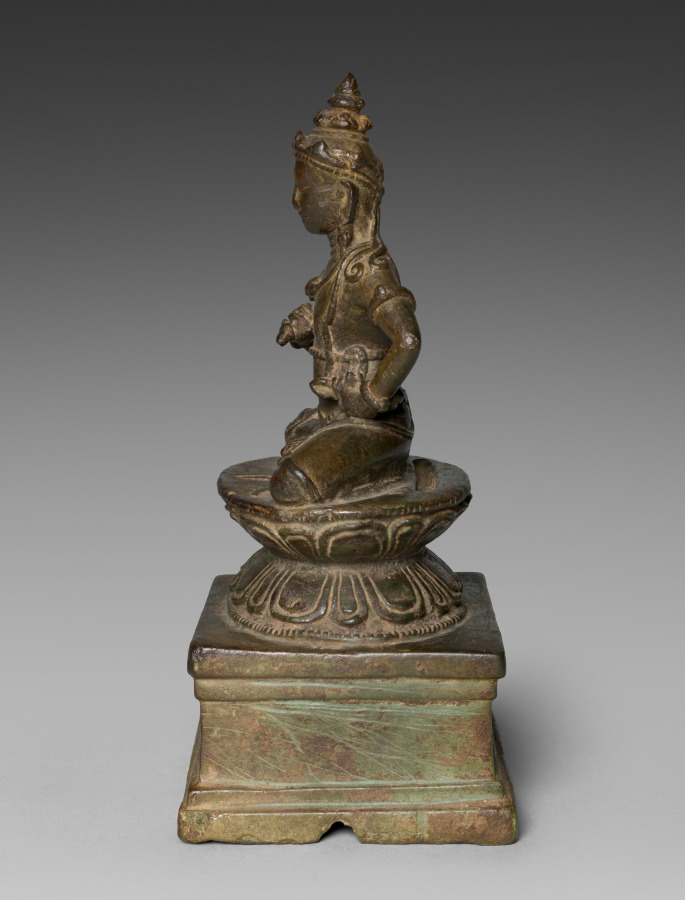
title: Vajrasattva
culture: Cambodia, style of Angkor Thom, 12th-13th century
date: 1100s–1200s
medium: bronze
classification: Sculpture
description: Vajrasattva is a Buddhist being of enlightenment who holds the vajra, or thunderbolt, in his right hand and a bell in his left. The vajra and bell are the basic implements used in tantric rituals that were popular under Jayavarman VII and practiced at Banteay Chhmar. Tantra is a form of Buddhism that makes use of rituals and mantras to aid practitioners in reaching their goals quickly, as though with the speed of lightning. Tantric texts and rituals were used frequently in Cambodia, from the 900s onward, but they were especially prominent under Jayavarman VII. This form of Buddhism appears to have been supplanted by other forms after the 1400s. Small bronze images of Vajrasattva may have been brought out from a temple treasury during the performance of Buddhist rituals that followed the instructions in a Sanskrit text, brought to Cambodia from India, called the Hevajra-tantra. In that text Vajrasattva manifests at key moments in the rituals.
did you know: From the back of the crown hang cords, which drape over the shoulders. The same type of cords hang from the back of the belt, coiling over the legs symmetrically on either side.